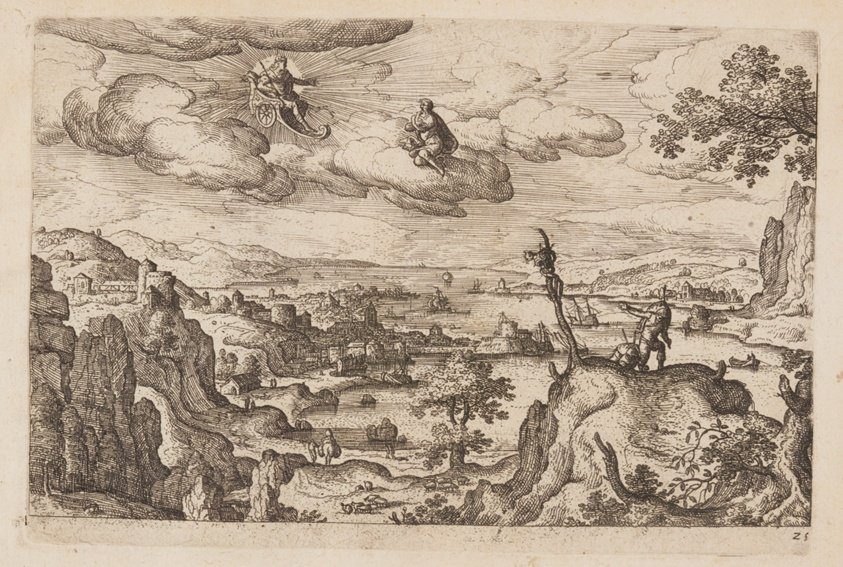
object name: Print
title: Plate 25, from Landscapes with Scenes from the Old and New Testament and Ovid’s Metamorphoses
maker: Hans Bol (Flemish, 1534–1593); published by Philip Galle (Flemish, 1537–1612)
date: 1574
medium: Etching on ivory laid paper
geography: Flanders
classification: print; paper; prints and drawing; etching